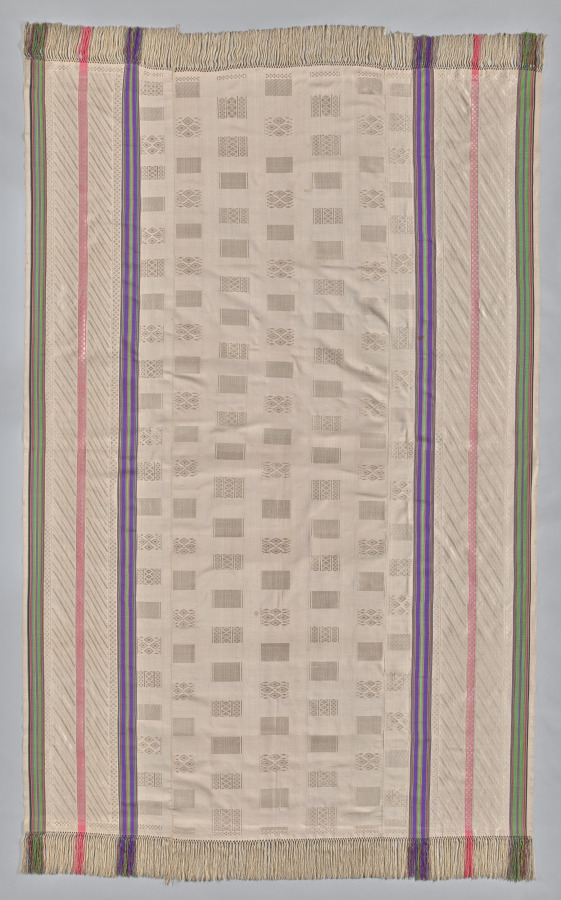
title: Wrapper (Lamba Akotifahana)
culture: Madagascar, Merina Kingdom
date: 1860–90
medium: silk (Bombyx mori and Borocera cajani)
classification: Textile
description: A lamba is an untailored textile worn by all ages, classes, and genders across much of Madagascar. Woven from shining Bombyx mori silk, the lamba akotifahana takes its name from the weft-float motifs (akotifahana) that adorn it. Once the color of commoners and the enslaved, when Christianity became the state religion in 1869, elite churchgoers preferred white silk lambas. The rows of knotted fringe reflect Malagasy taste for Chinese-made “Manila shawls.”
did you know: A shining lamba like this was wrapped around the shoulders over tailored clothing like a suit or dress.